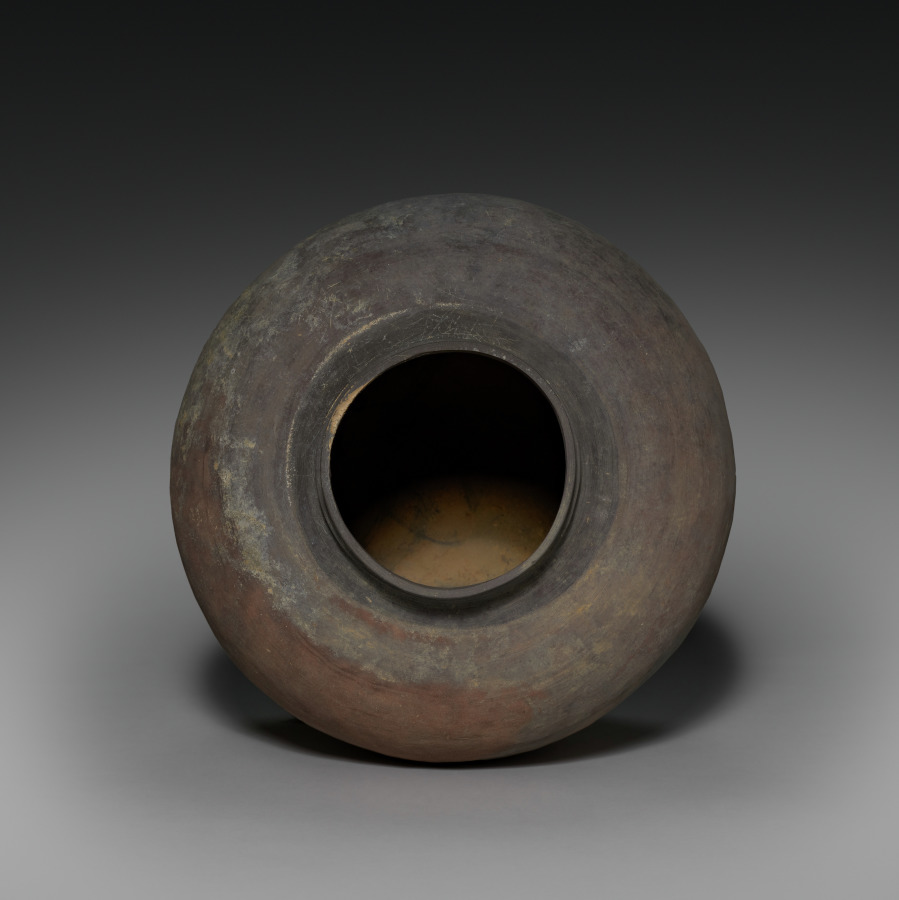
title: Vessel with Knobbed Lid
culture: Korea, Gaya period (42–562 CE)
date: 200s–300s CE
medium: stoneware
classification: Ceramic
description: This storage vessel is distinguished by its robust, subtly proportioned form and its body color. The purplish-brown surface "skin" is enlivened by a series of smoky black swirling marks that occurred during the firing in the wood kiln. This shape began as a series of clay coils that were pinched and then paddled; however, it spent more time on a potter's wheel to thin and finish its outer surface. The lid received similar, understated attention to detailing and finish.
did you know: This type of lidded vessel served to contain cremated remains, indicating the popularity of Buddhist mortuary practice in Korea during the Three Kingdoms period.